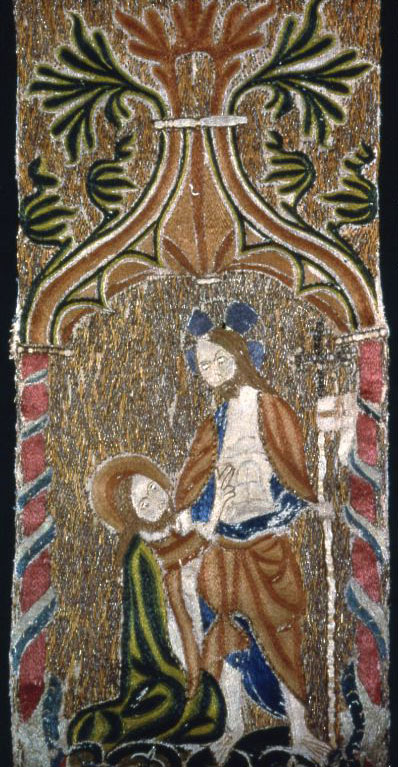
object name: Textile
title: Orphrey Band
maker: Probably England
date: 1375/1400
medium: Linen, plain weave; underlaid with linen, plain weave; embroidered with gilt- and silvered-metal-strip-wrapped silk, linen and silk in knot, overcast, satin, split, and stem stitches; laid work, couching, and hemp, padded couching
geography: England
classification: textile; needlework (visual works); liturgical